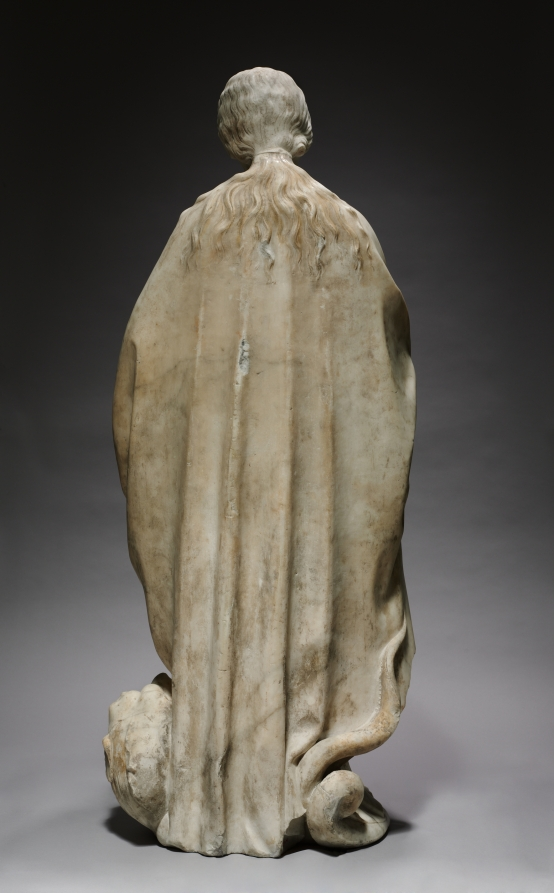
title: Saint Margaret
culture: Italy, Sicily, Palermo, 16th century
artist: Antonello Gaggini (Italian, 1478–1536)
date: c. 1520–1530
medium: marble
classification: Sculpture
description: Gaggini was a member of a large family of sculptors whose Palermo workshop supplied monumental religious sculptures for the cathedrals of Palermo and Messina in Sicily and Montelione in Calabria. After 1507 Antonello himself worked for 15 years to produce marble sculptures for Palermo Cathedral. This figure of the legendary virgin martyr, Saint Margaret, was probably commissioned for one of these ecclesiastical foundations, possibly the chancel of Palermo Cathedral. The saint is shown reading from a book of hours (a sign of her piety) and trampling upon a dragon, the symbol of Satan. The dragon became the attribute by which she is recognized in sacred art.